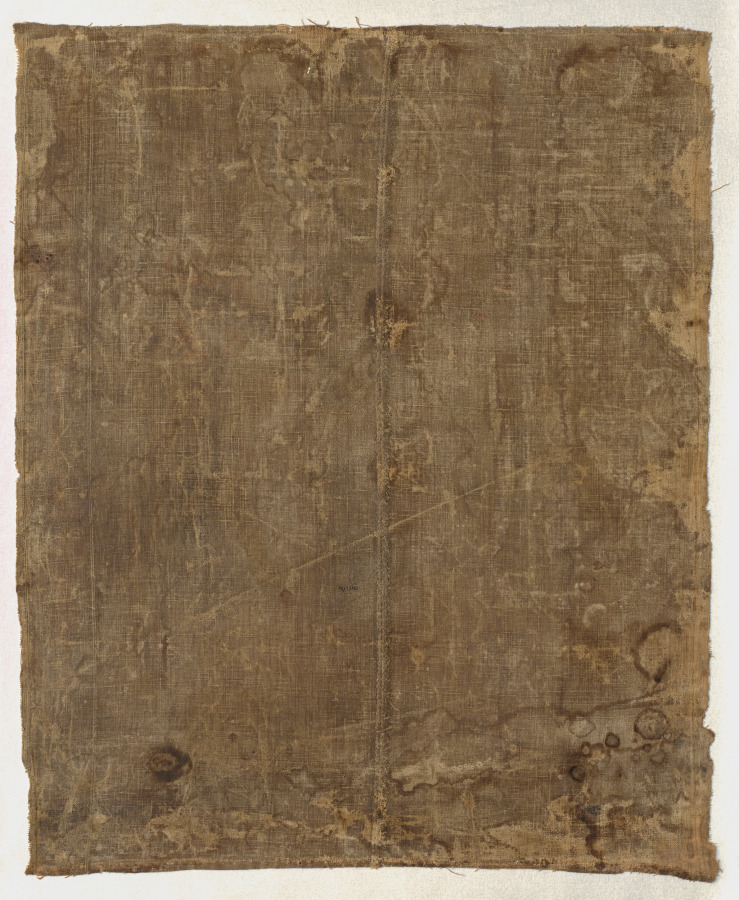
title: Seated Amitabha with Attendants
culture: India, Western Himalayas, Lahul and Spiti, Tabo Monastery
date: c. 1100s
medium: Gum tempera and ink on sized cotton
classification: Painting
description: The red Buddha of the West, Amitabha, seated in meditation on his throne, is flanked by bodhisattvas. Above are two rows of monks who transmit his teachings, and along the bottom is a row of six adepts, skilled practitioners of magic and the recitation of mantras to reach enlightenment quickly. In front of his throne are the three flaming jewels of Buddhism: the Buddha, his teaching (dharma), and the spiritual community (sangha). Its unfinished state reveals the fluid and accomplished ink drawing delineating all the forms. This painting is one of the earliest surviving thangkas—devotional Buddhist paintings on cloth. It is from the region ruled by the Guge kings of western Tibet from the 900s to 1600s, now partially within the national borders of India.